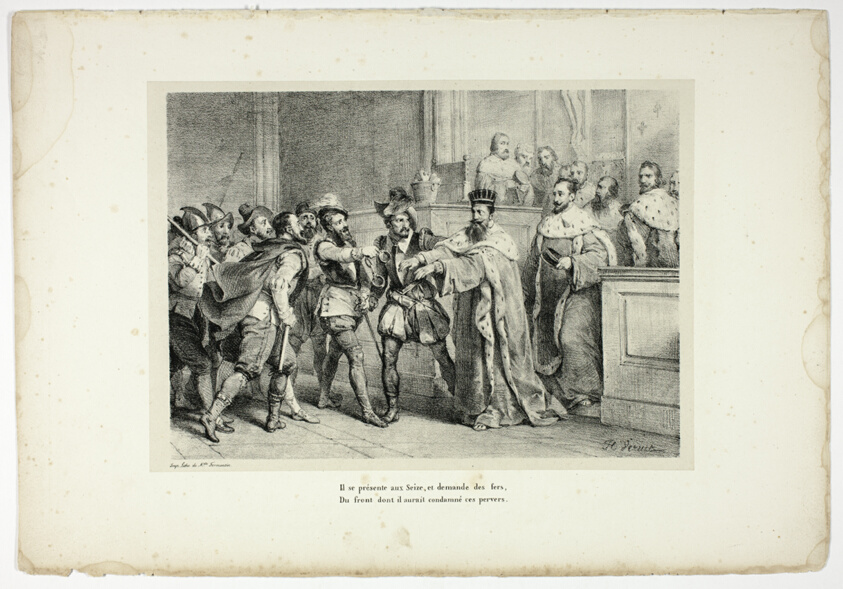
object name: Print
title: Il se présente aux Seize, et demande des fers...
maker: Horace Vernet (French, 1789-1863); poem by Voltaire (French, 1694-1778); printed by Mademoiselle Formentin (French, 18th-19th century); published by Dubois (French, 18th-19th century)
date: 1825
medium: Lithograph in black on cream chine, laid down on ivory wove paper (chine collé)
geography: France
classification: lithograph; print; prints and drawing